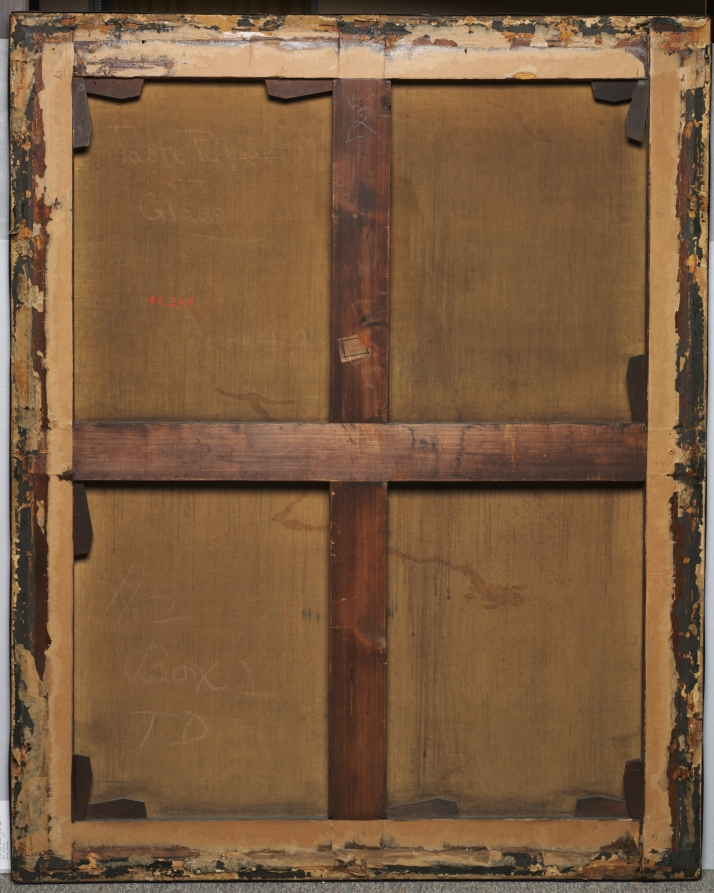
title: Portrait of Mrs. Leneve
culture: England, 17th century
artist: Peter Lely (British, 1618–1680)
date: c. 1657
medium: oil on canvas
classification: Painting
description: This woman’s heavily lidded eyes, fleshy chin, and slender fingers conform to 17th-century ideals of beauty, but when the museum acquired this painting in 1942, her features had been extensively overpainted to bring her more in line with modern standards of beauty. This later intervention included lowering the sitter’s eyebrows, reducing her prominent eyes and lips, and adding curls to make her forehead appear smaller. Mrs. Leneve now appears as the fashionable artist Peter Lely originally intended.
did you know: Long, slender fingers signified aristocratic elegance when this portrait was painted.